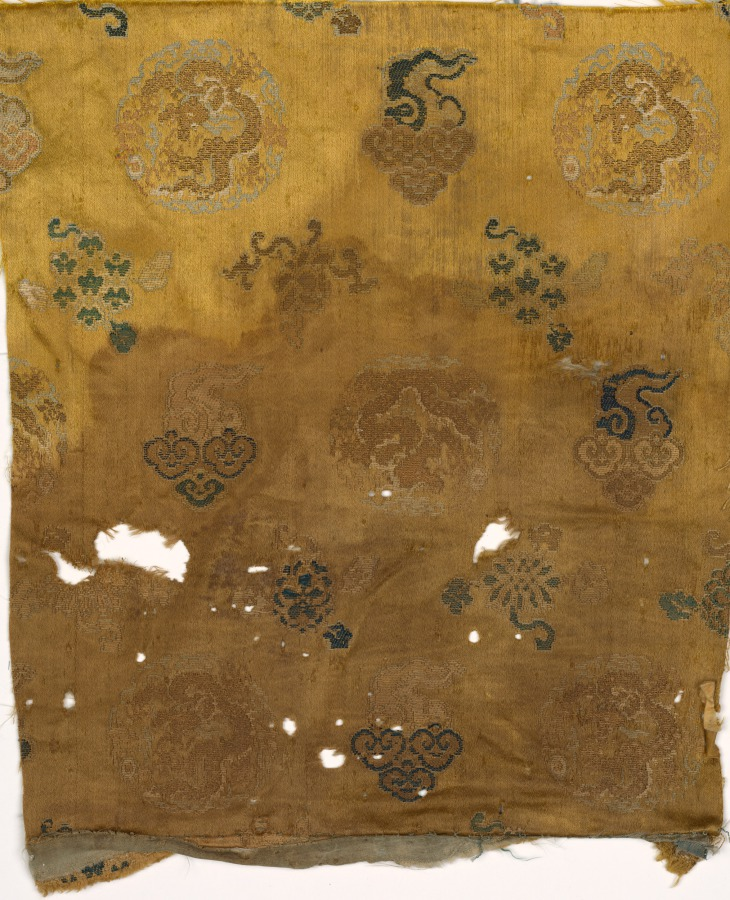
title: Fragment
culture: China, 18th century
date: 1700s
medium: brocaded satin, silk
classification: Textile